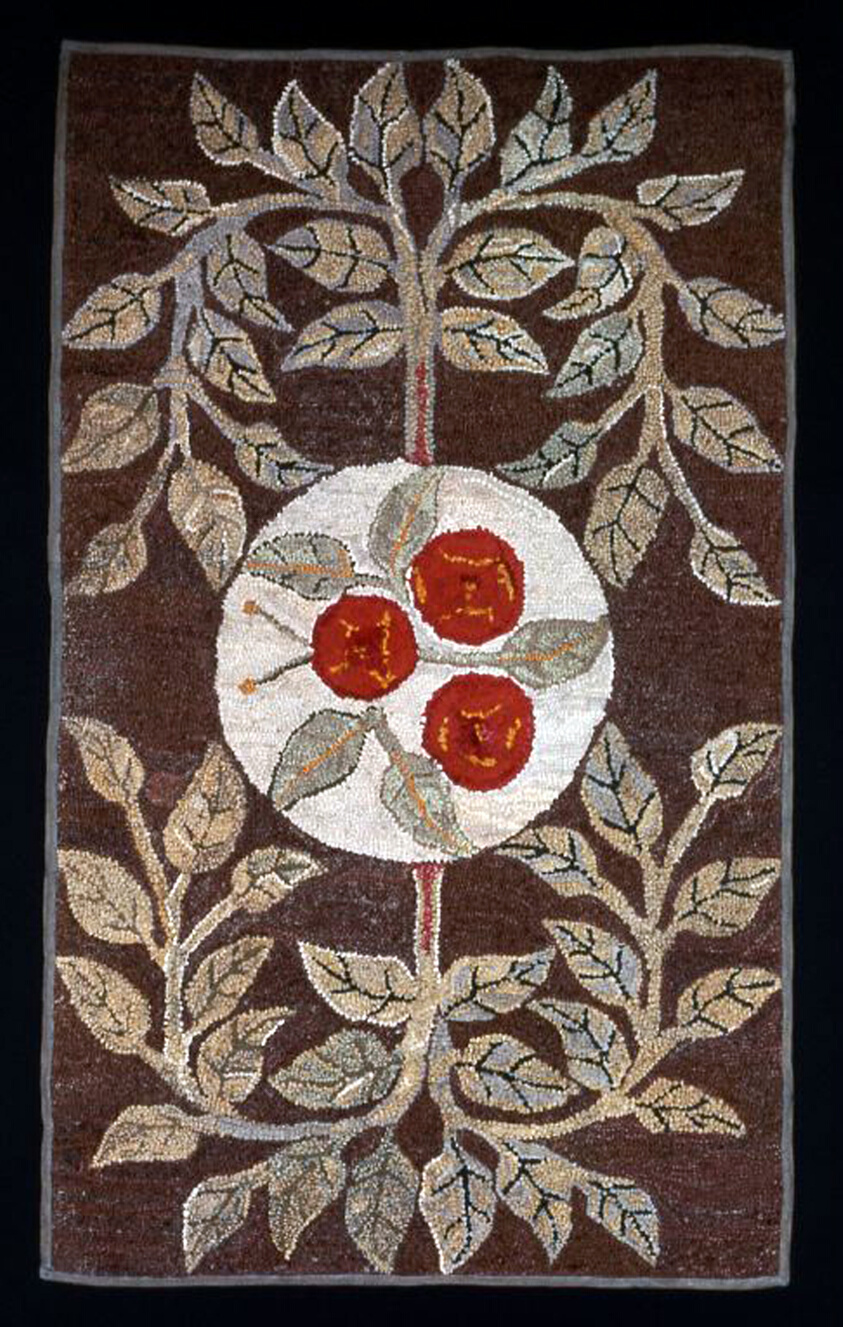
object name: Textile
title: Rug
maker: United States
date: 19th century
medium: Variety of fibers, plain weave with variety of fibers, yarns, felted, knitted, oblique interlaced and/or woven strips, forming "hooked" pile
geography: United States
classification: textile; needlework - rug